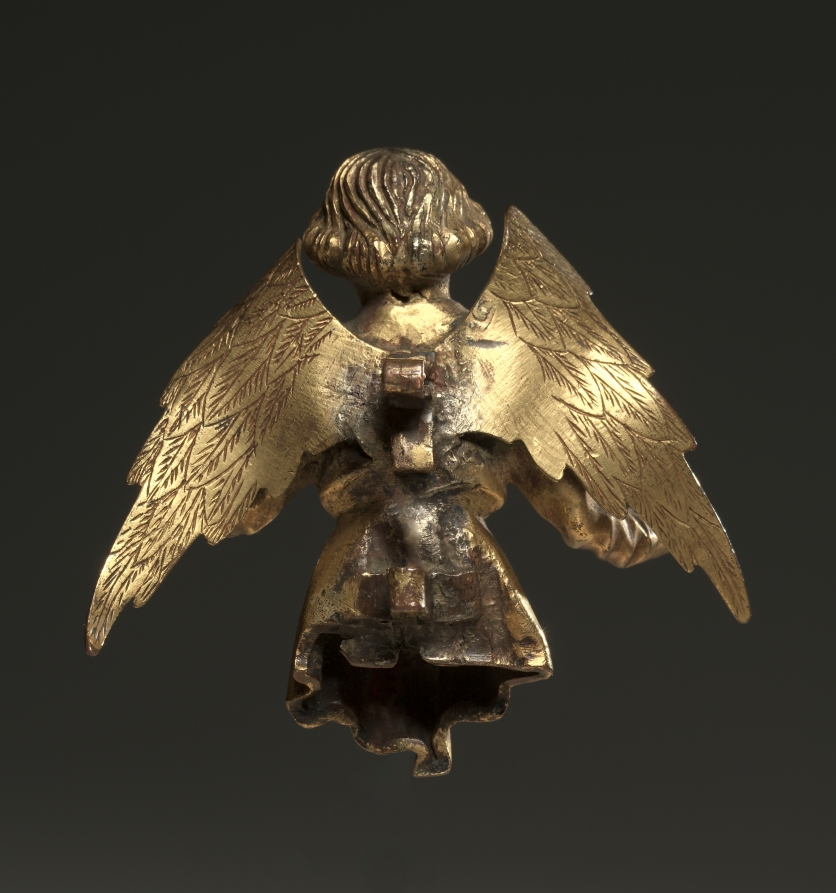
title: Angel from an Architectural Reliquary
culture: Franco-Netherlands or Paris, 15th century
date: c. 1400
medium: gilt bronze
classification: Sculpture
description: This beautiful Gothic angel is probably a surviving element from a large architectural reliquary. The last clue to its lost context disappeared when the symbolic attribute was twisted from the angel’s fingers, possibly during the destructive zeal of the French Revolution. The technique and style are characteristic of the lay workshops employed by the Valois courts during the early 1400s.